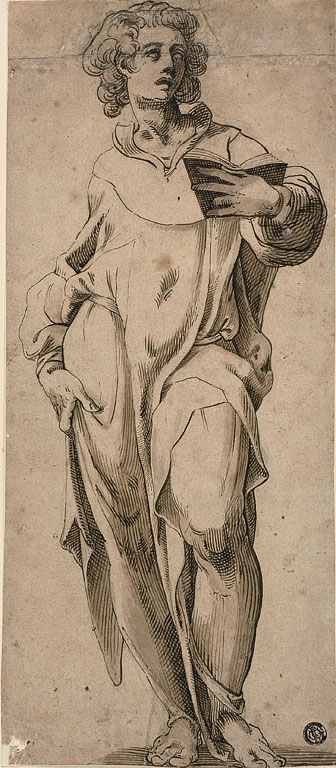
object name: Drawing and Watercolor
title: Saint John the Evangelist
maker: Attributed to Abraham Bloemaert (Dutch, 1566-1651); or Michiel Coxie, I (Flemish, 1499-1592); or Cornelis Cornelisz (Dutch, 1562-1638)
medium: Pen and brown ink, with brush and brown wash, over traces of black chalk, on buff laid paper, pieced together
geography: Netherlands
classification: pen and ink drawings; drawings (visual works); prints and drawing